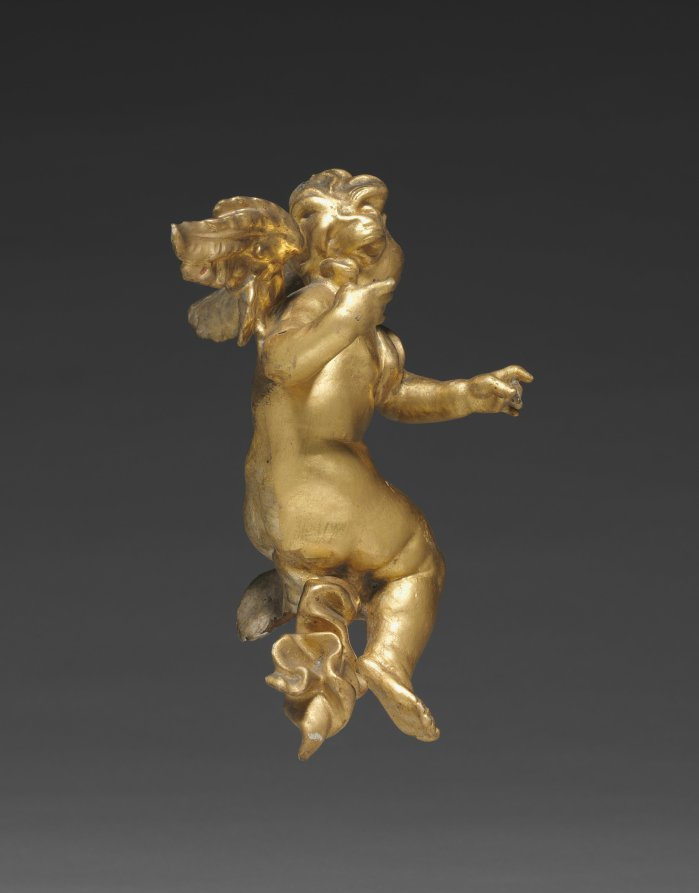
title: Altarpiece with Relics - Putto, middle left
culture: Germany, Bavaria, 18th century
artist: Joseph Matthias Götz (German, 1696–1760)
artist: and Workshop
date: c. 1735–1740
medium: gilded wood, with relics in niches: gilded wood, mother-of-pearl, ebony, red silk, gold wire, seed pearls, rock crystal, pen and ink on paper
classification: Sculpture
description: Götz covers every surface in gold leaf, giving each part of the object equal importance, rather than simply framing a central picture. In this distinctively Central European approach, figural narrative is subordinate to the overall ensemble. Götz designed this object to rest on top of an altar, probably in front of a larger painted or sculpted decorative scheme. The work contains relics seen through the small windows on the perimeter. These small remains of holy figures demonstrate the persistence of a medieval Catholic tradition well into the 1700s.